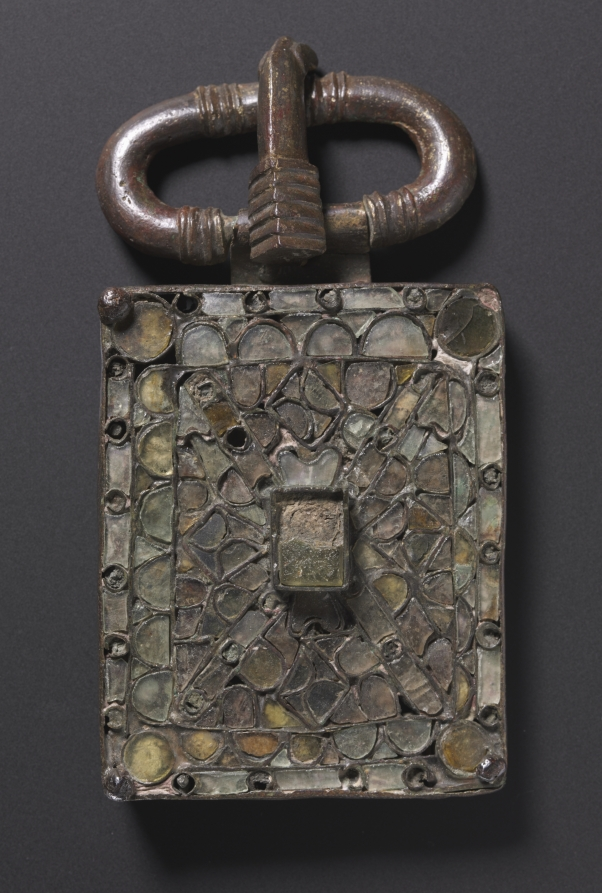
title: Belt Buckle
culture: Visigothic, Iberian Peninsula, Migration period, 6th century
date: c. 525–560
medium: bronze and glass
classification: Jewelry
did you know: Elaborately decorated belt buckles were symbols of wealth and status.